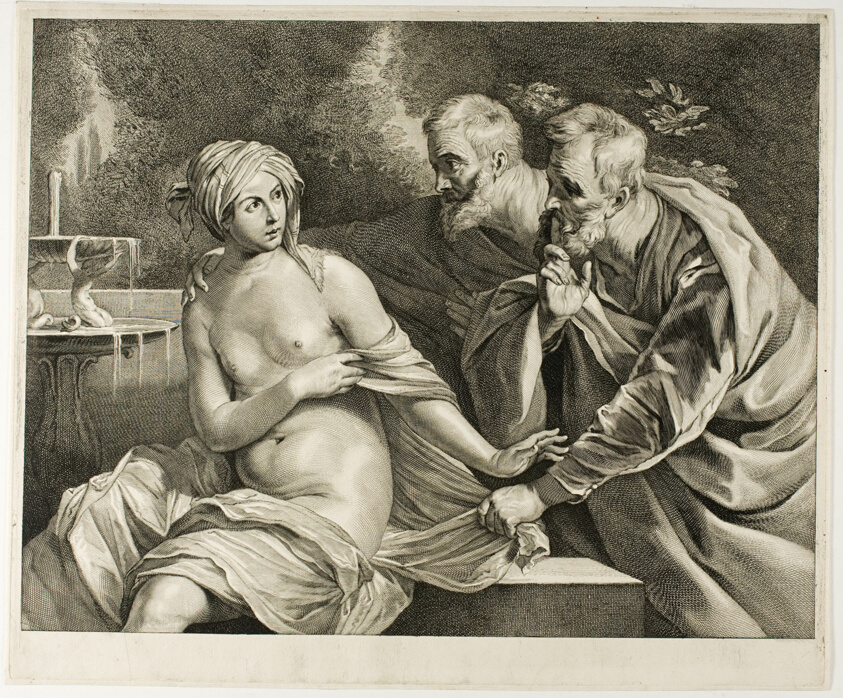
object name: Print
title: Susanna and the Elders, from Cabinet Reynst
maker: Cornelis Visscher (Dutch, c. 1629-1658); after Guido Reni (Italian, 1572-1642)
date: c. 1655-1658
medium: Etching and engraving on laid paper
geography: Holland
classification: engraving; print; prints and drawing